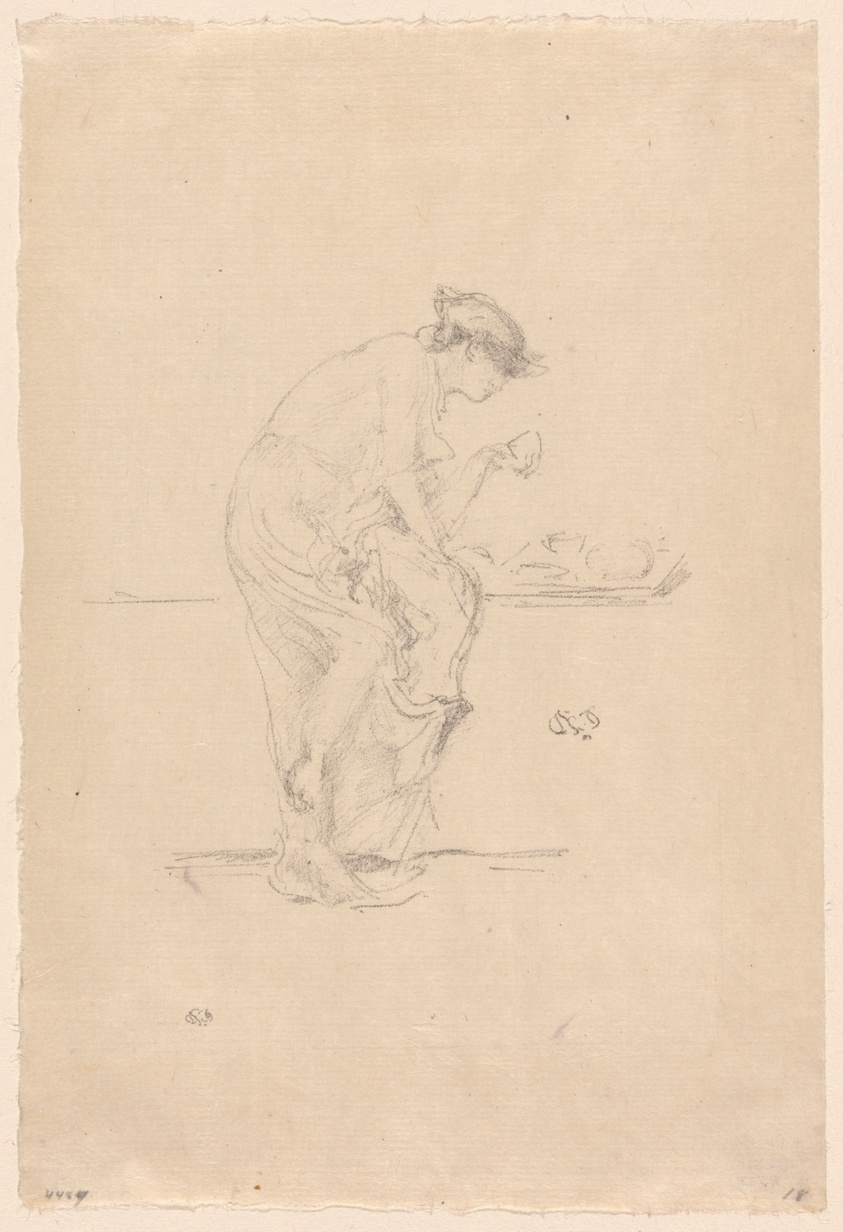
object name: Print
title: The Horoscope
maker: James McNeill Whistler (American, 1834-1903)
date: probably 1889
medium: Transfer lithograph in black on cream Japanese paper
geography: United States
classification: transfer lithograph; lithograph; print; prints and drawing; paper